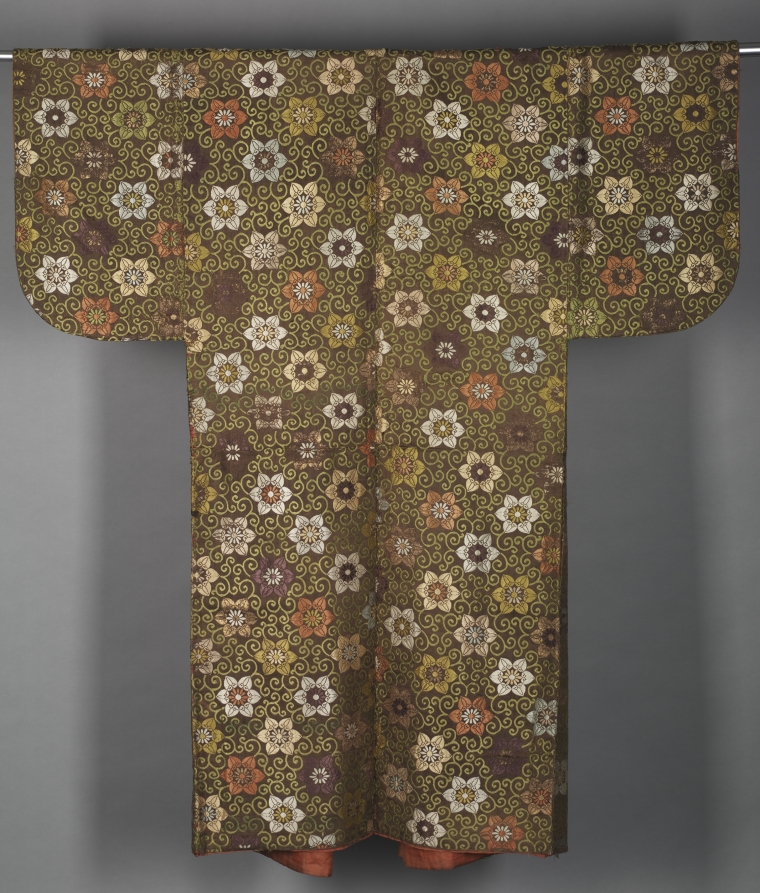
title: Noh Robe (Karaori)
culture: Japan, Edo period (1615–1868)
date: 1800–1850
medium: silk, twill weave with supplementary weft, brocaded; metal thread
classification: Garment